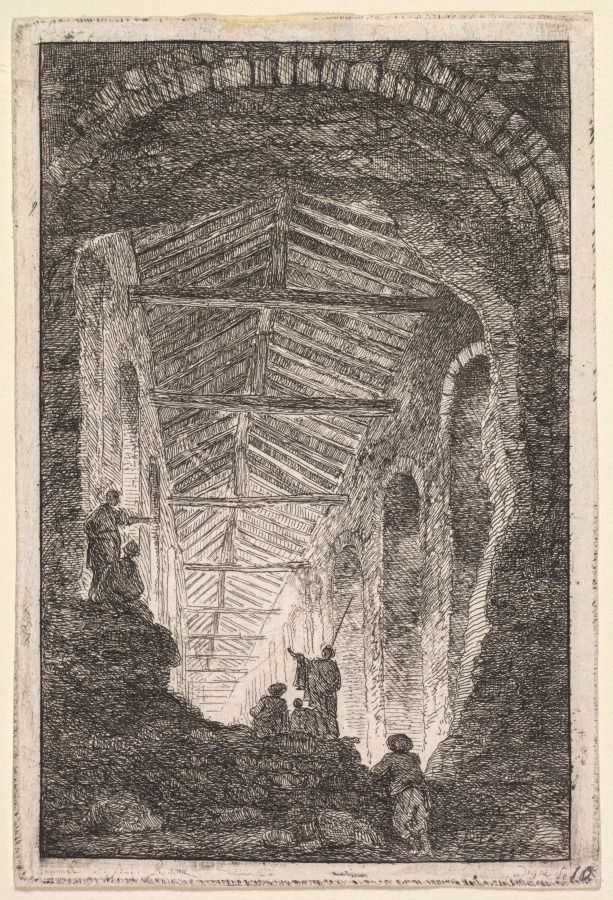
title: The Antique Gallery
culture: France, 18th century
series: Evenings in Rome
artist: Hubert Robert (French, 1733–1808)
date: 1763–64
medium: etching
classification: Print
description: Derived from his own pen-and-ink drawings, this suite of etchings features fictional characters situated near recognizable buildings and statues in Rome. On the title page, Robert dedicated the suite to Marguerite Le Compte, who visited Rome in 1764 in the company of the wealthy author and art enthusiast Claude Henri Watelet. Both Le Compte and Watelet were amateur etchers, and they socialized with a group that included artists and printmakers centered at the academies in Italy. Robert’s dedication was likely motivated by the hope of future patronage from Le Compte. She may be the generous woman with a hand muff depicted in The Ancient Temple, the fifth scene in this series.